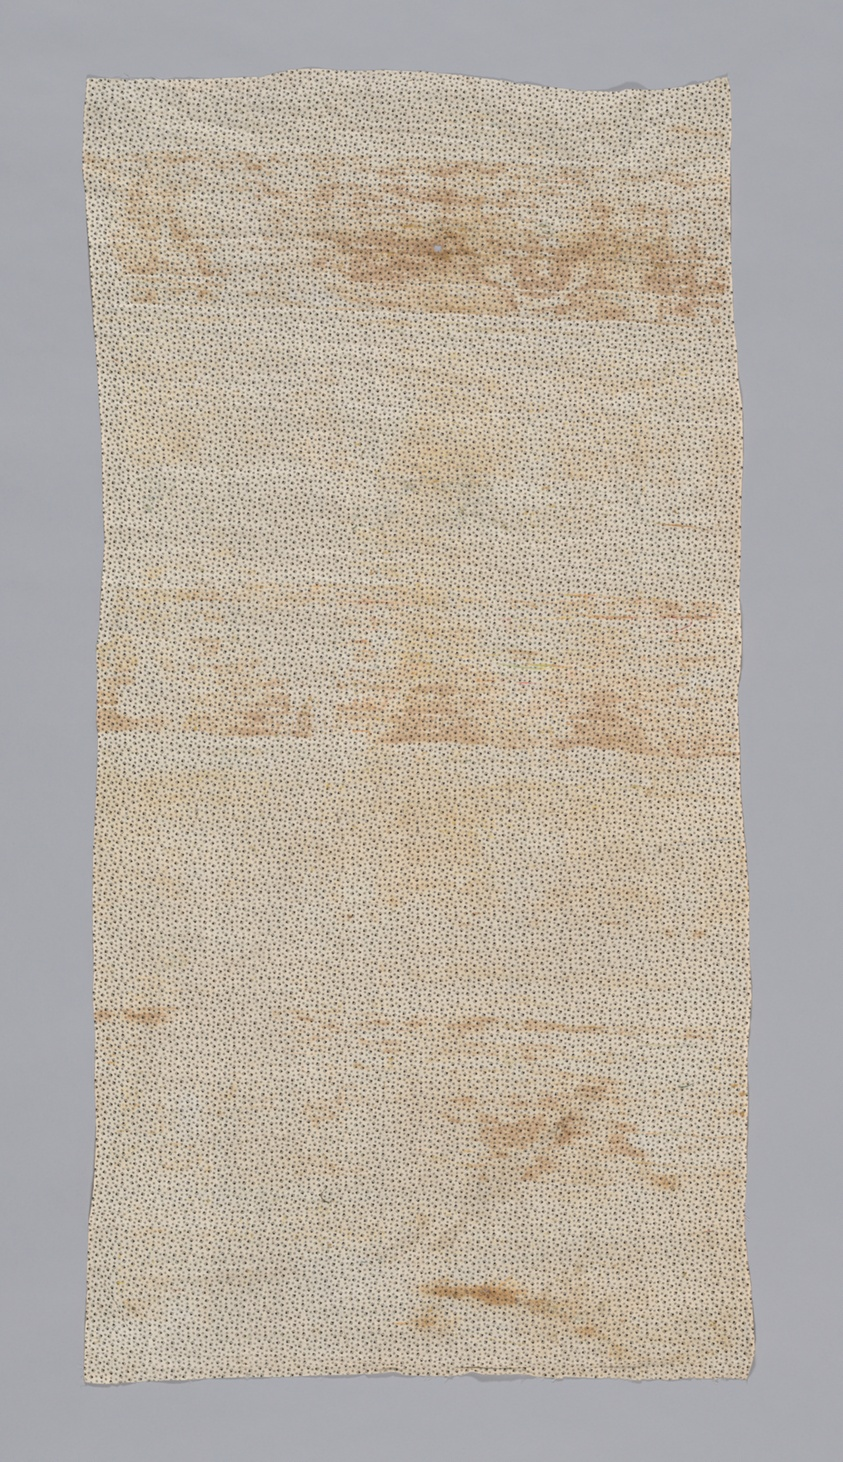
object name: Religious/Ritual Object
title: Backing from Thanka (Religious Picture)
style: qing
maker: Manchu (China)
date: 18th century, Qing dynasty (1644–1911)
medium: Cotton, plain weave; roller printed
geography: China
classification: textile; weaving - printed; ritual objects